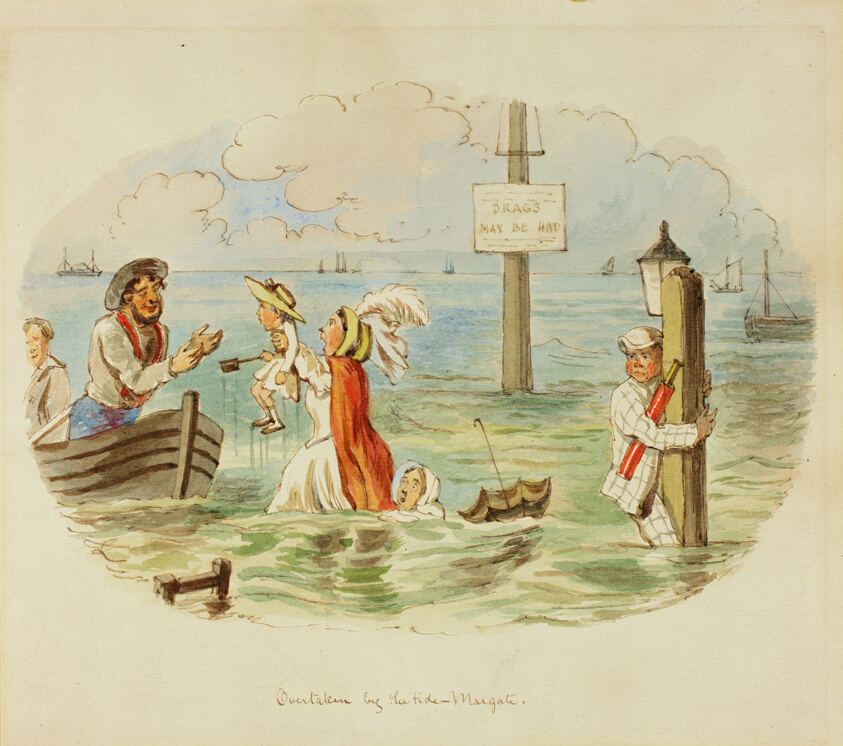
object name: Drawing and Watercolor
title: Overtaken by the Tide-Margate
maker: John Leech (or possibly after); English, 1817-1864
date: 1840/50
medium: Watercolor, with pen and brown ink, on cream wove paper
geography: England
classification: watercolor; drawings (visual works); prints and drawing